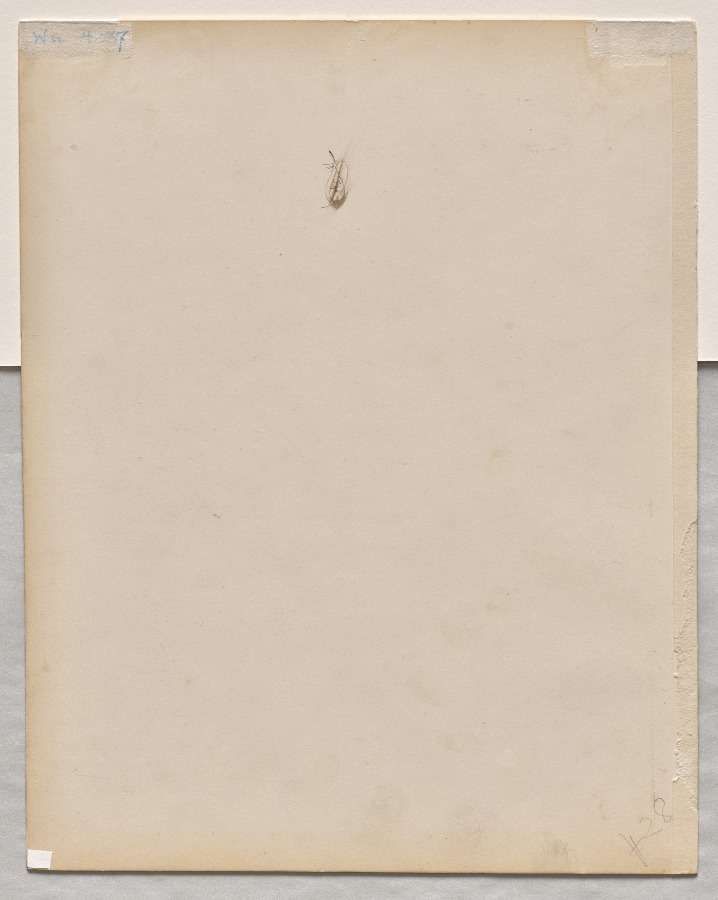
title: Face in Profile (verso)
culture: France, 19th century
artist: Paul Baudry (French, 1828–1886)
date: late 1860s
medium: pen and brown ink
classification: Drawing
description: When Paul-Jacques-Aimé Baudry was commissioned to create the ceiling paintings for the Grand Foyer of the new Paris Opéra in 1864, for inspiration he visited the Sistine Chapel frescoes by Michelangelo—completed more than 300 years earlier. This drawing depicts the god Apollo from behind, intended for a scene in which Apollo points to the satyr Marsyas, with whom he held a musical competition. The pose and figure type recall Michelangelo’s monumental sculpture of David, which Baudry would have also seen on his Italian journey.